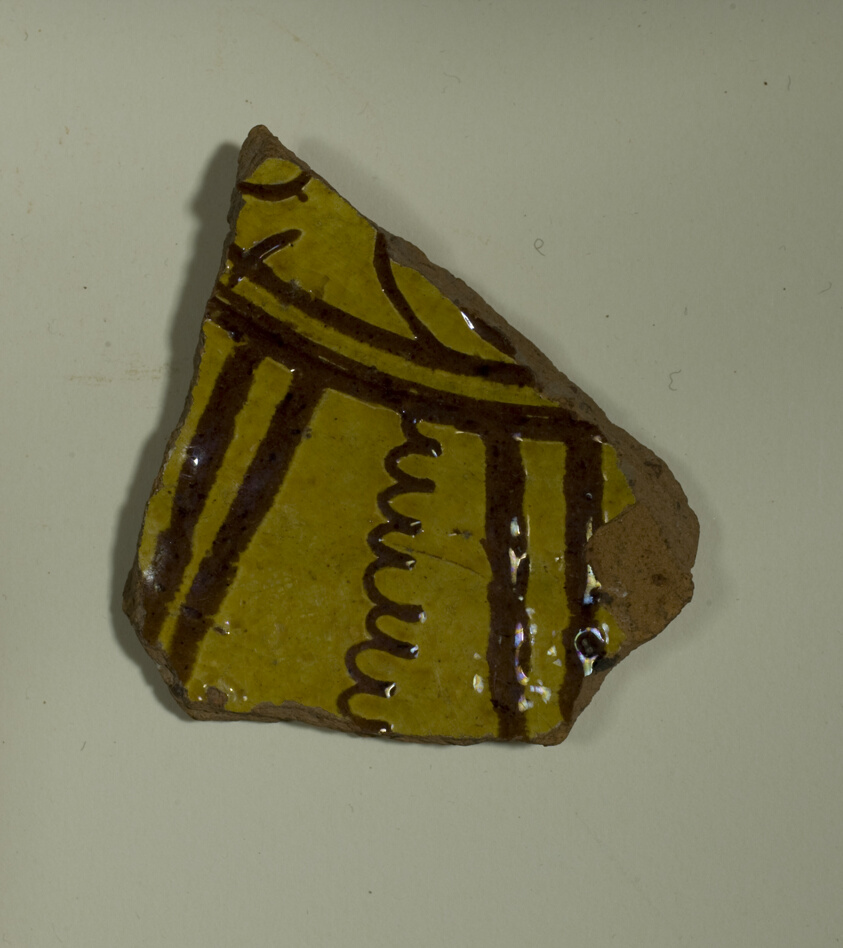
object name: Decorative Arts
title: Fragment of a Plate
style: byzantine, european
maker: Byzantine (Asia Minor, Constantinople or Greece, Thessaloniki)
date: 13th-14th century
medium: Ceramic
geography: Istanbul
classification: fragment; ceramics; plate (general, dish); asian art; decorative arts